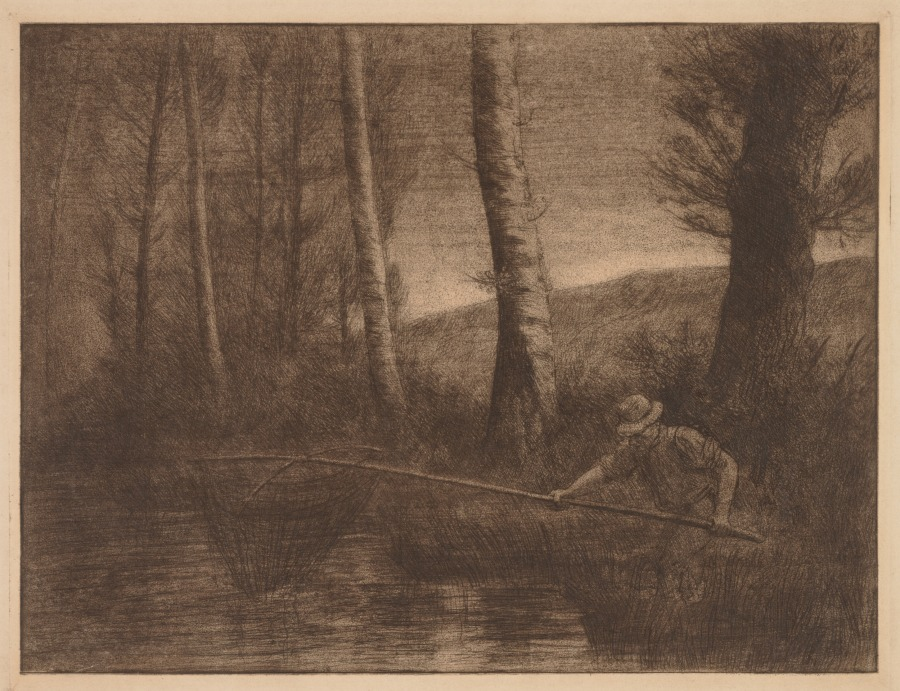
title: The Fish in the Hoop Net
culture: France, 19th-20th century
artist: Alphonse Legros (French, 1837–1911)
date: c. 1857–1911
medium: etching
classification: Print